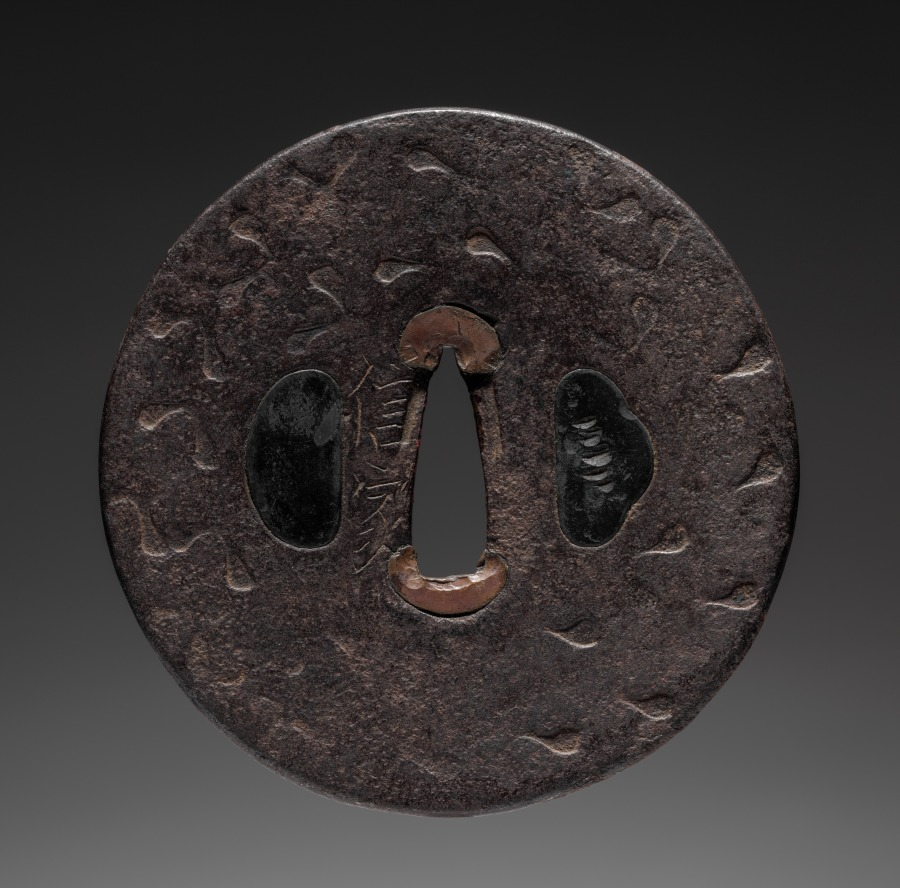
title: Sword Guard (Tsuba)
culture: Japan, Muromachi period (1392–1573)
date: 1500–1573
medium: iron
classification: Arms and Armor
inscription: Signature: Nobuiye